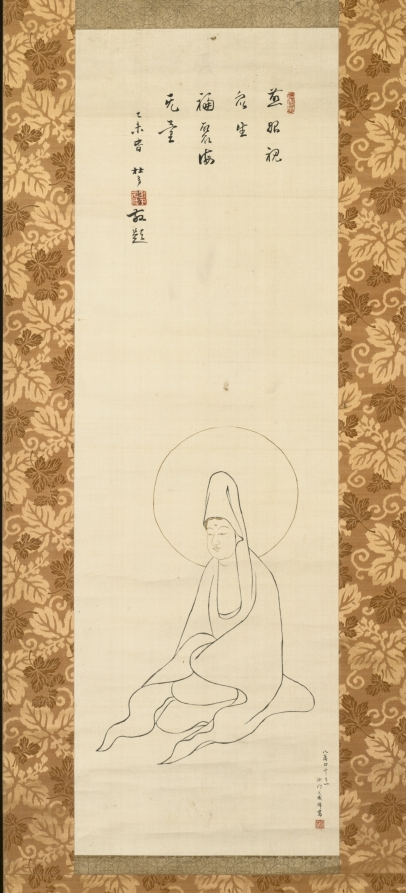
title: White-Robed Guanyin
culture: China, Yuan dynasty (1271-1368)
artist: copy after Jueji Yongzhong (Chinese, active around 1300)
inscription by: Zhongfeng Mingben (Chinese, 1263–1323)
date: late 1200s–early 1300s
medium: hanging scroll; ink and gold on silk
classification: Painting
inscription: Inscription: one of the 84,000 painted by the priest Insei.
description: The original model for this ink drawing of Guanyin, the bodhisattva of infinite compassion (Avalokiteshvara in Sanskrit), is CMA 1978.47.1. This drawing is a later copy with the same image of the White-Robed Guanyin, but in reverse. The inscription above reads: one of the 84,000 painted by the priest Insei. The inscription seems to indicate that the Japanese priest Insei repeatedly copied the image of the bodhisattva in an act of piety and to accumulate merit, as is promised in the Lotus Sutra for anyone who paints images of the Buddha, they “will achieve the Buddha path.” The priest’s name and seal need further study and identification.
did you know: The bodhisattva's face and halo were delicately painted in gold.